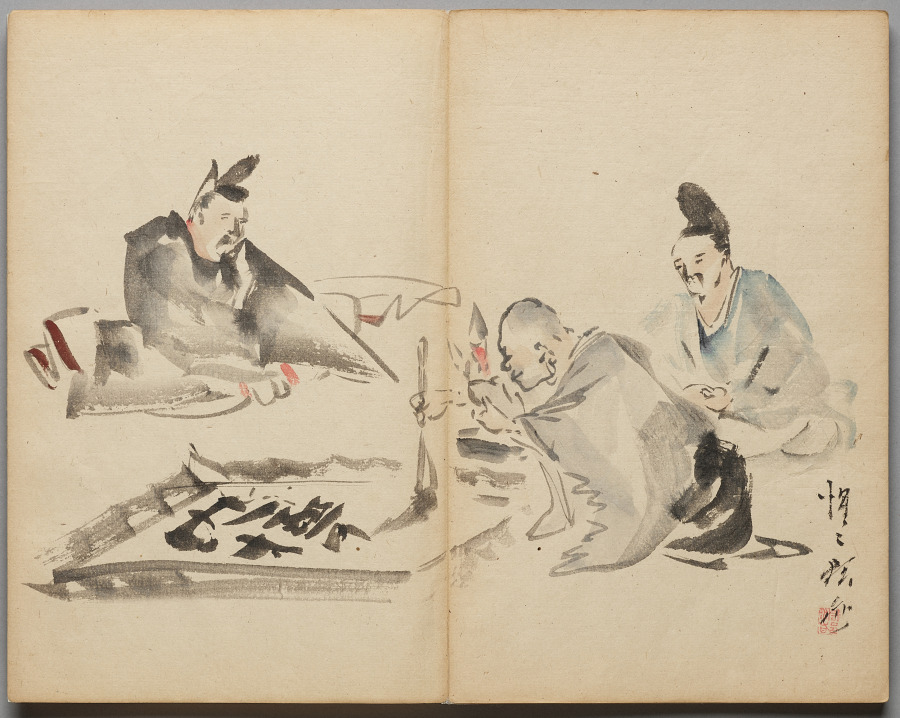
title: Monk at Calligraphy from Sketch Album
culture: Japan, Edo period (1615–1868) to Meiji period (1868–1912)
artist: Kawanabe Kyōsai (Japanese, 1831–1889)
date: mid- to late 1800s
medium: Accordion-style book of 26 double-leaves; ink and color on paper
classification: Bound Volume